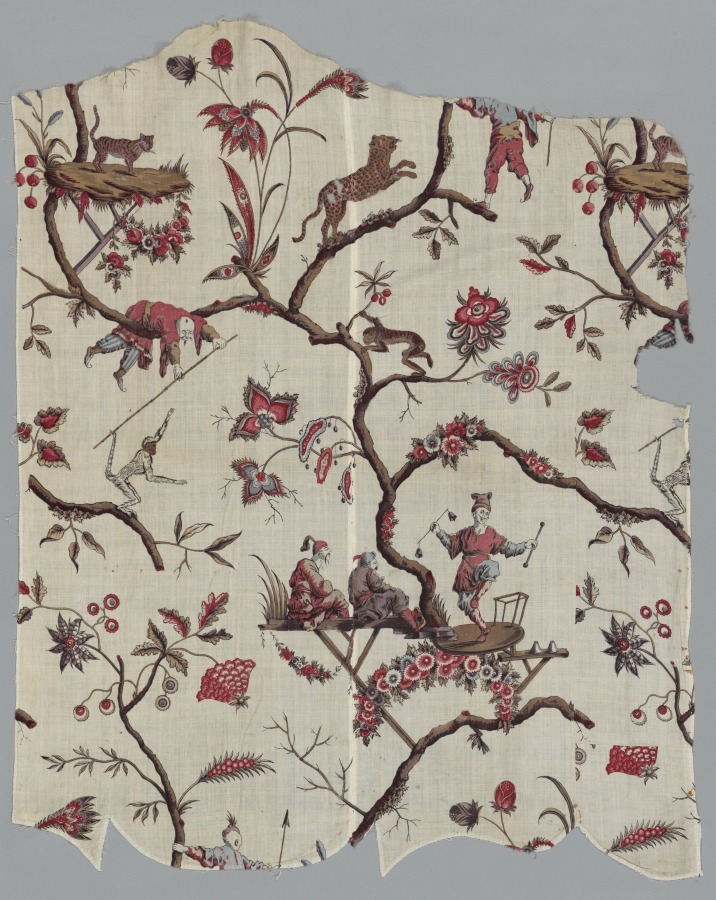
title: Woodblock Printed Textile Fragments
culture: France, late 18th century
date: c. 1785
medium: woodblock print on cotton and linen mixed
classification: Textile